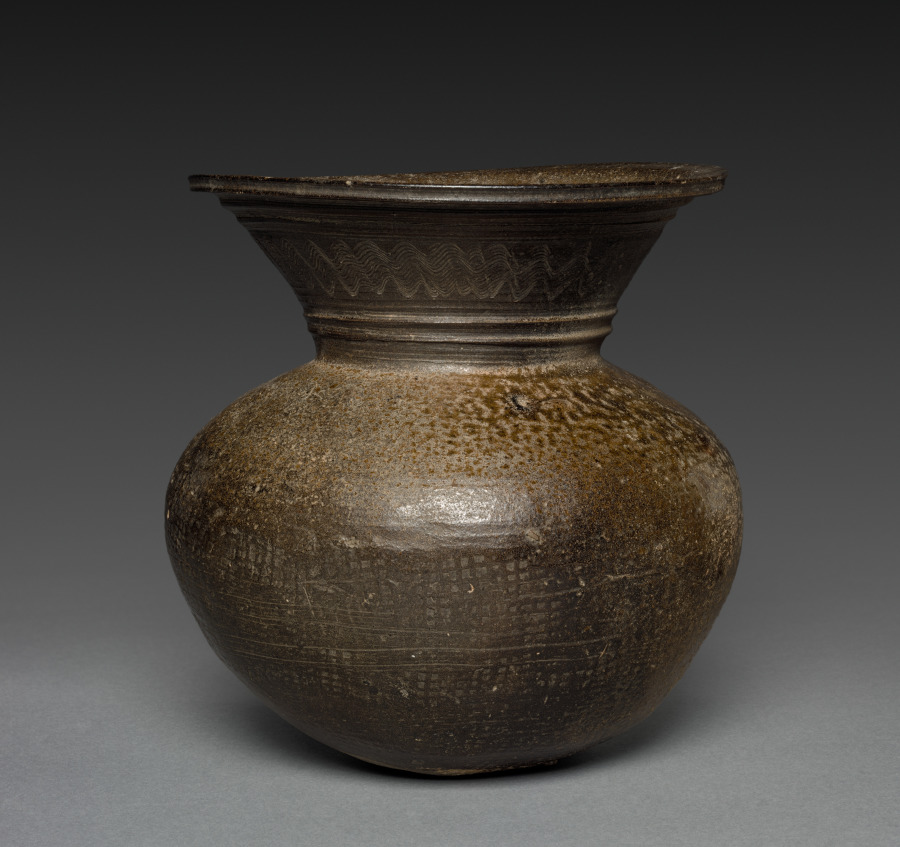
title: Jar with Combed Design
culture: Japan, Kofun period (300–710 CE)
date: 400s–500s CE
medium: stoneware with natural ash glaze, impressed and tooled patterns (Sue ware)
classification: Ceramic